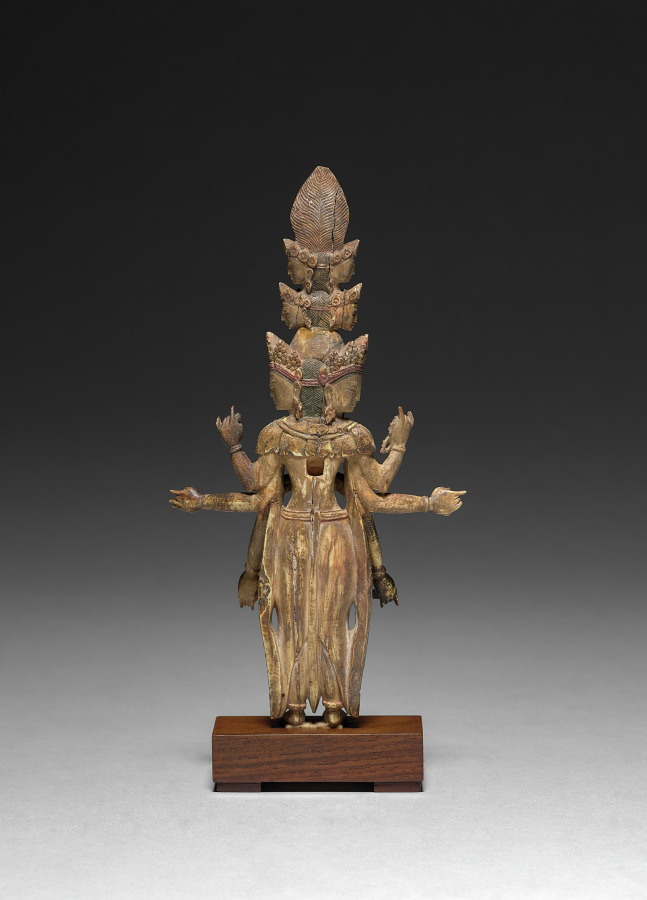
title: Eleven-Headed Avalokitesvara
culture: Nepal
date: 1500s–1600s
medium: painted ivory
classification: Ivory